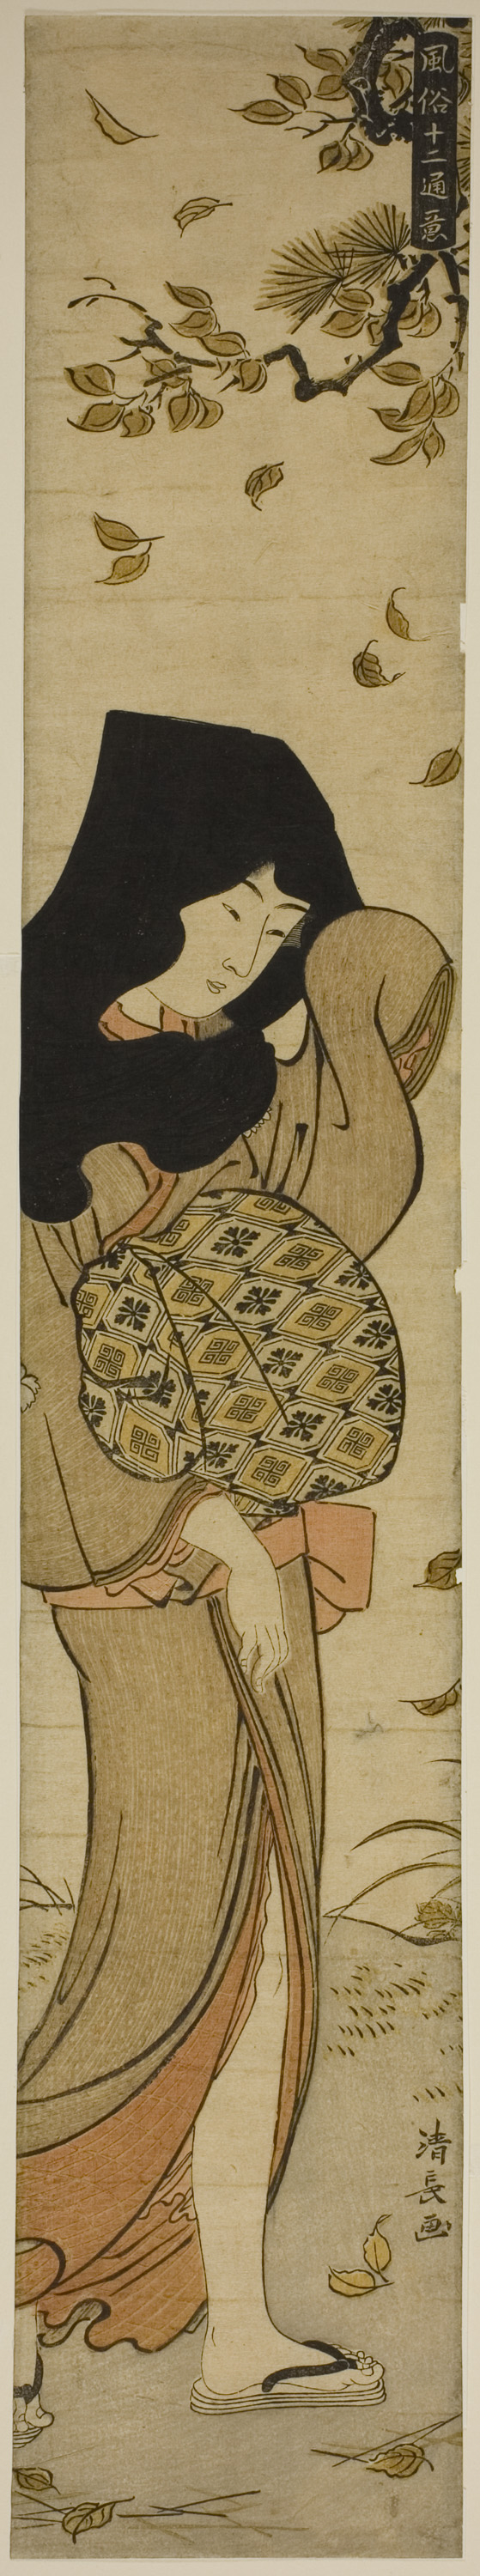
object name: Print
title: Woman with Black Hood in Windblown Leaves, from the series "Twelve Scenes of Popular Customs (Fuzoku juni tsui)"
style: Japanese (culture or style)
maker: Torii Kiyonaga (Japanese, 1752-1815)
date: c. 1783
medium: Color woodblock print; hashira-e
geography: Japan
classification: woodblock print; print; asian art